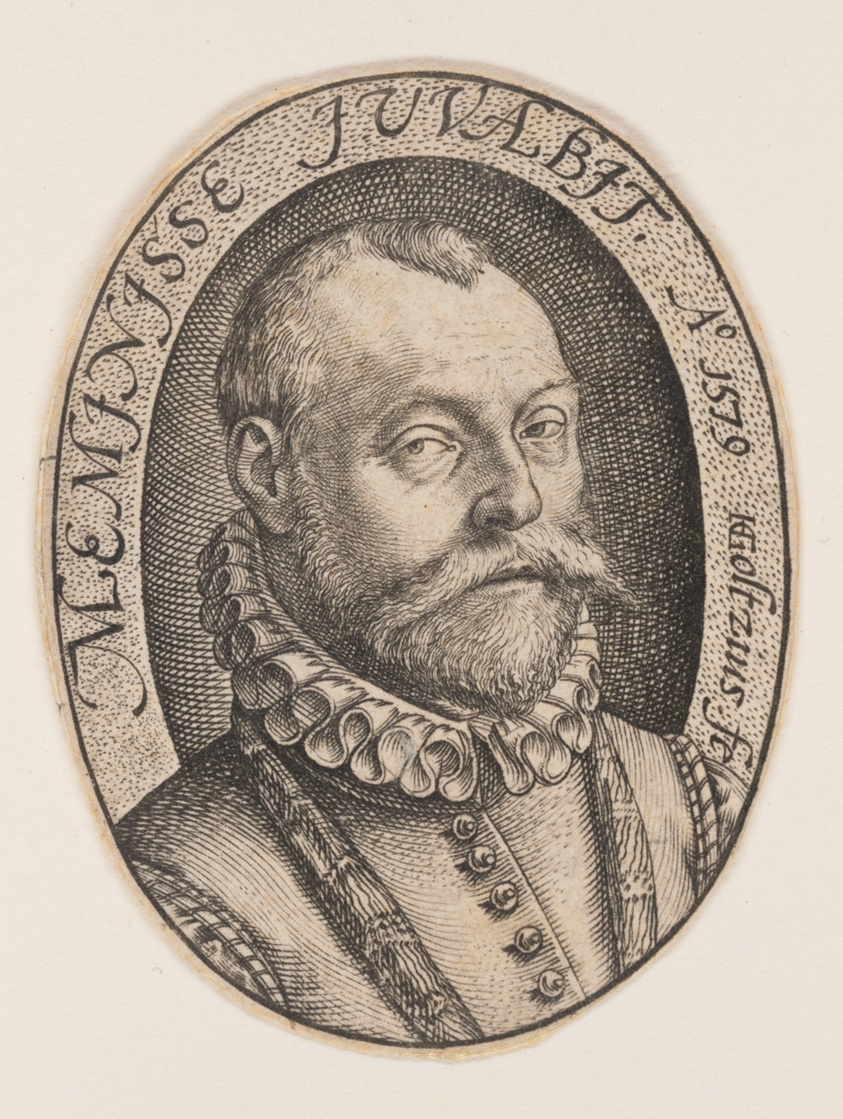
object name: Print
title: Bust of a Man Facing Right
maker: Hendrick Goltzius (Dutch, 1558–1617)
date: 1579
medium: Engraving on paper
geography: Netherlands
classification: engraving; paper; print; prints and drawing